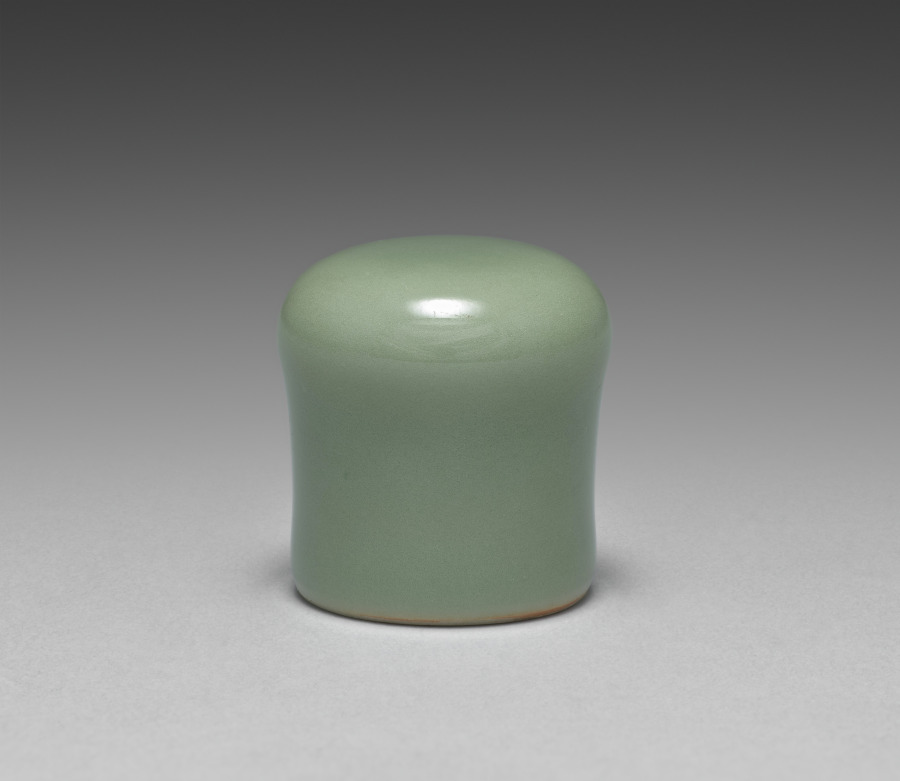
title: Roller End for Hanging Scroll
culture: Japan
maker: Seifū Yohei III (Japanese, 1851–1914)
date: 1893–1914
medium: One of a pair of hanging scroll roller ends; porcelain with celadon glaze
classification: Ceramic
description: Before entering into his apprenticeship with Yohei II, Seifū Yohei III trained as a painter in Osaka. He continued to paint throughout his career as a ceramist. As part of his ceramic practice, Yohei III also made roller ends to be placed at either end of the wooden dowel around which the lower part of a hanging scroll mounting is wrapped. These served both as weights for the painting and as knobs for handling it when rolling and unrolling. The pair here is made of porcelain with a green glaze.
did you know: This is one of two roller ends for the hanging scroll by Seifū Yohei III, Rain Clearing over a Summer’s Mountain, CMA 2022.151.